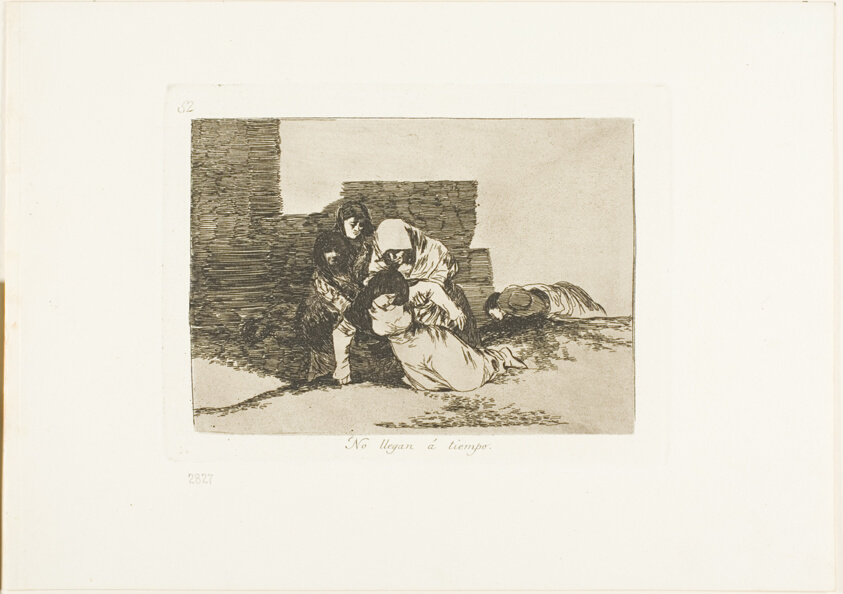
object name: Print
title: They Do Not Arrive in Time, plate 52 from The Disasters of War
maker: Francisco José de Goya y Lucientes (Spanish, 1746-1828)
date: 1812/15, published 1863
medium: Etching, lavis, drypoint and burin on ivory wove paper with gilt edges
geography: Spain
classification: etching; print; prints and drawing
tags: war